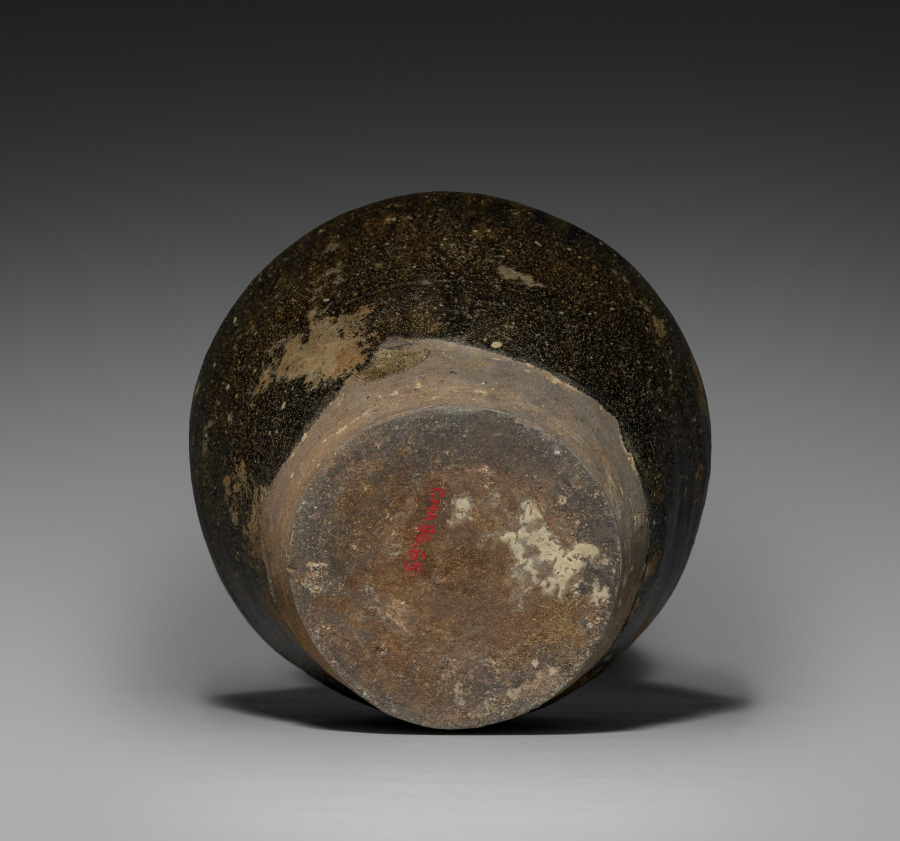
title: Storage Jar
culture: Thailand, Sawankhalok, 14th century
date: 1300s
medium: stoneware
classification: Ceramic